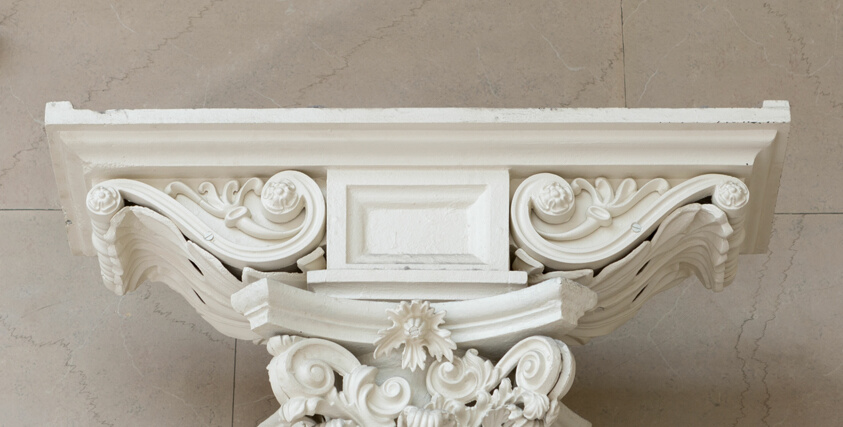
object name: Architectural fragment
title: Interior Column Capital from the Winston Block, Chicago, Illinois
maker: Frederick H. Baumann (American, 1826-1921) and Edward Baumann (American, 1828-1889)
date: 1872 (demolished 1982)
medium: Painted cast iron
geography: Chicago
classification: architectural fragment; architecture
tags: Chicago